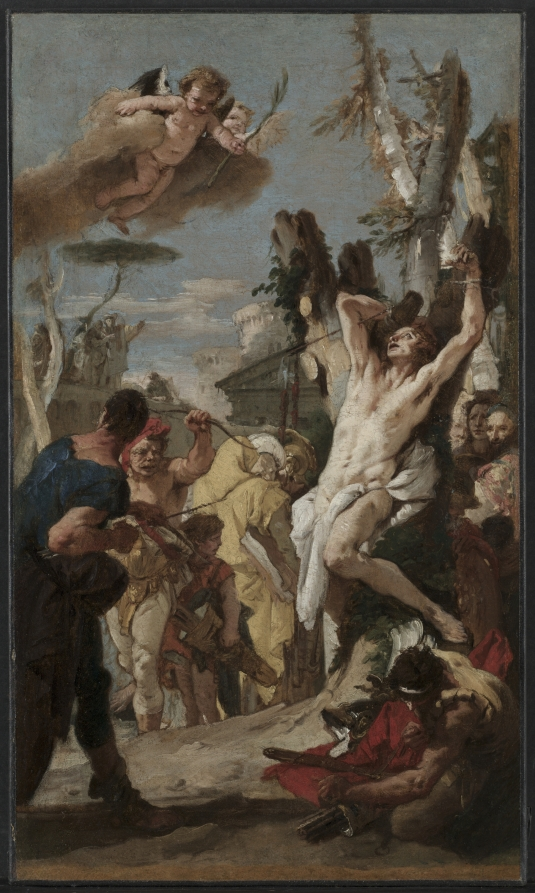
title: Study for "The Martyrdom of Saint Sebastian" (for the Augustinian monastery at Diessen, Germany)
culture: Italy, 18th century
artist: Giovanni Battista Tiepolo (Italian, 1696–1770)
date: 1739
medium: oil on canvas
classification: Painting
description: In 1739 a pair of monumental altarpieces by two Venetian painters (Giovanni Battista Tiepolo and Giambattista Pittoni) were installed in a church in southern Germany, part of a carefully orchestrated decorative program that included architecture, painting, sculpture, and decorative stuccowork. This sketch is Tiepolo’s initial design for his altarpiece, submitted for approval before beginning the final work. With quick, assured brushstrokes, he represents the Christian martyr Sebastian bound to a tree and shot with arrows, flooded with radiant light to symbolize his devotion to his faith.